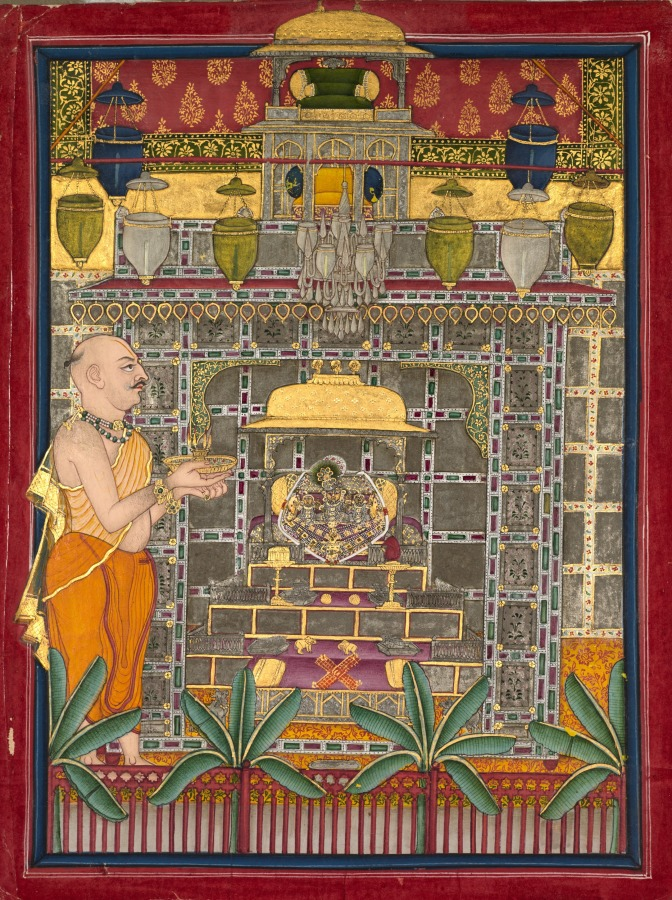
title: Maharao Kishor Singh II of Kota (r. 1819–28) Worshiping Krishna as Brij Rajji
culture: Northwestern India, Rajasthan, Rajput Kingdom of Kota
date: c. 1825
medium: Gum tempera, silver, and gold on paper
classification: Painting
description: The ruler of the small princely state of Kota, dressed as a priest of the Pushti Marg sect, holds a lamp with five flames. He pays homage to a triad of metal images with Krishna in the center, flanked by two consorts, enshrined in a small kiosk lined with metallic panels designed to reflect light. This icon is worshiped only in Kota. A multitude of glass lamps hang from the ceiling, and toys and games to amuse Krishna and his companions have been arranged on the steps leading up to the altar, including brass elephants, silver cows, balls, and a pachisi board.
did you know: Mirrors line the back of the shrine.